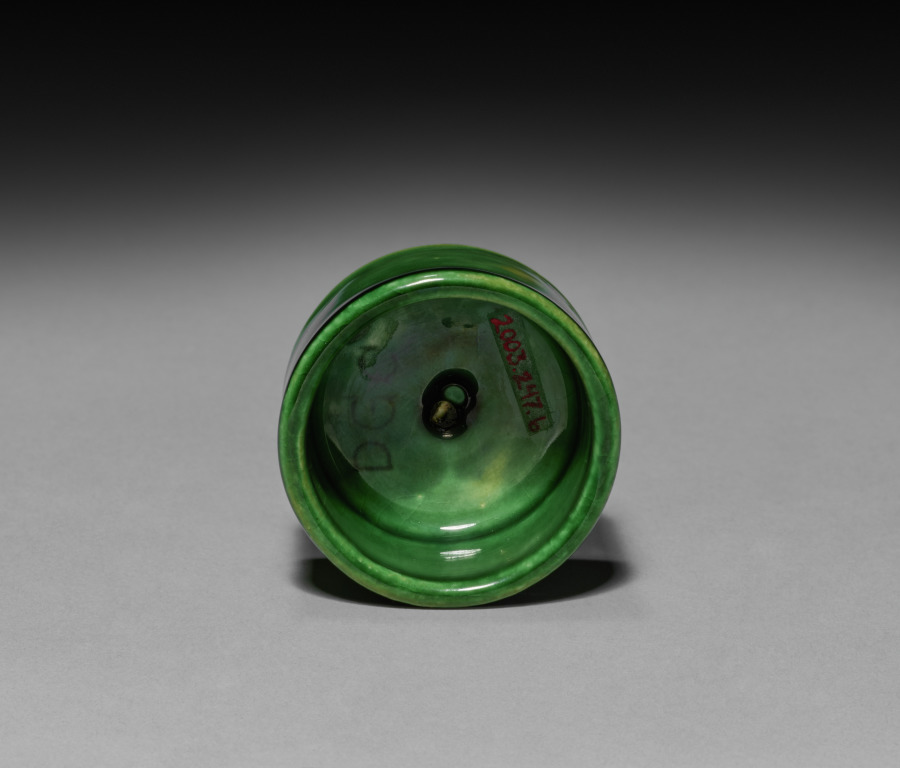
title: Cover for a Tea Caddy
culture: England, 18th century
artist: Staffordshire Factory (British)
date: c. 1750–1800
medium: earthenware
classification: Ceramic